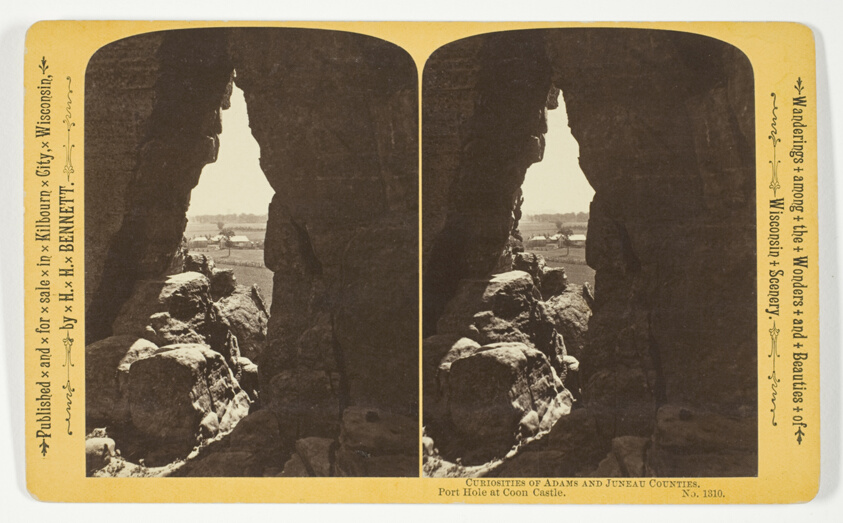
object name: Photograph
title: Port Hole at Coon Castle, No. 1310 from the series "Curiosities of Adams and Juneau Counties"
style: 19th century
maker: Henry Hamilton Bennett (American, born Canada, 1843-1908)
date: 1870/1908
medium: Albumen print, stereo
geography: Wisconsin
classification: photography; photograph; albumen silver print; stereograph (albumen)